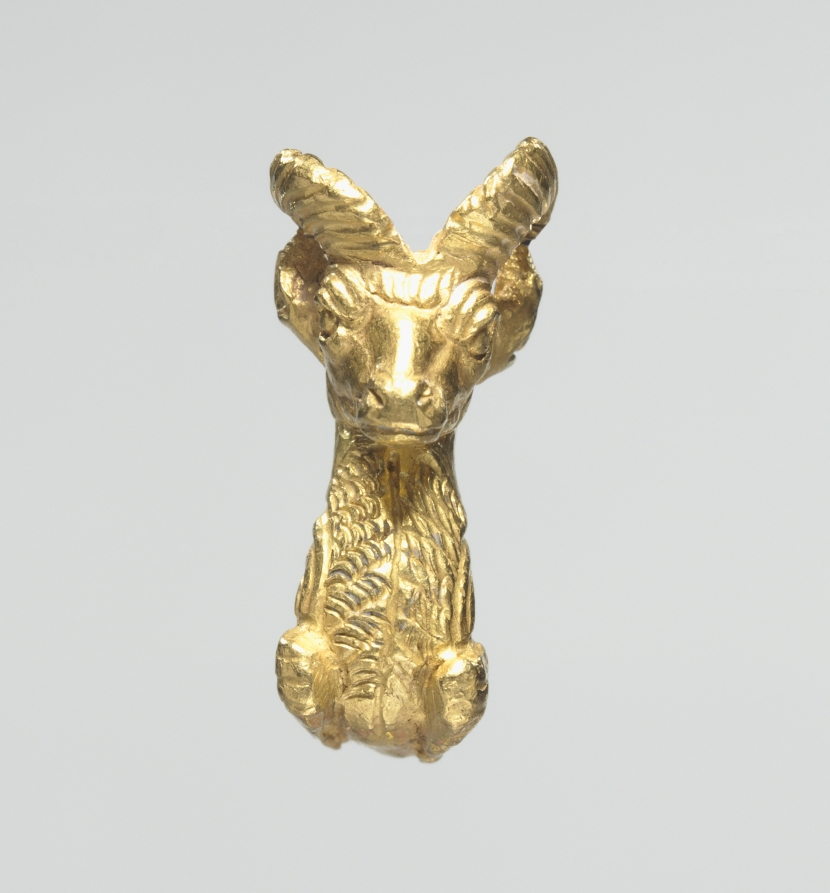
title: Ibex Bracelet Terminal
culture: Iran, Achaemenid (550–330 BCE)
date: 500–400 BCE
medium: gold, solid cast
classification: Jewelry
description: Ibex is also called Persian Wild Goat.